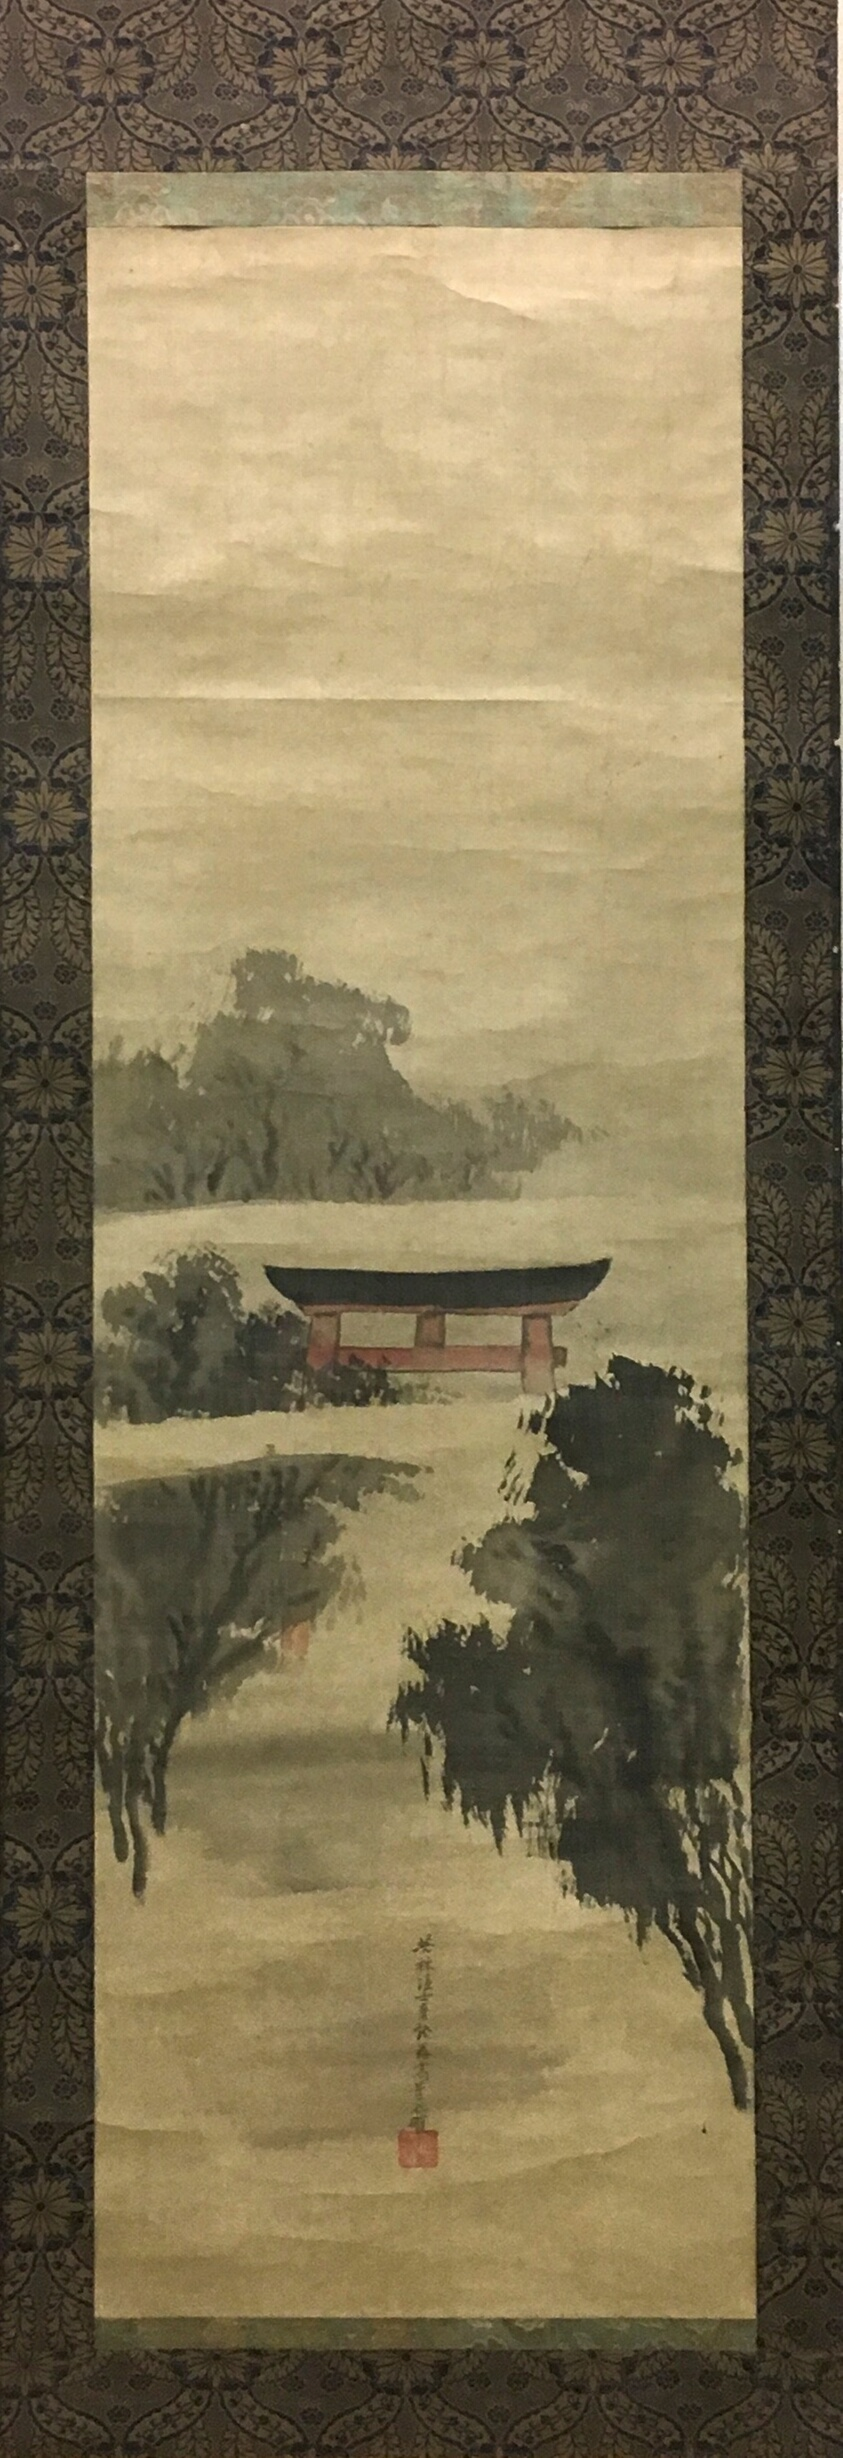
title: Ariwara no Narihira's Journey East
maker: Ko Sukoku; Japanese, 1730-1804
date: late 18th century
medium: One of a pair of hanging scrolls (with 1992.172); Ink and color on silk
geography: Japan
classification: painting; asian art